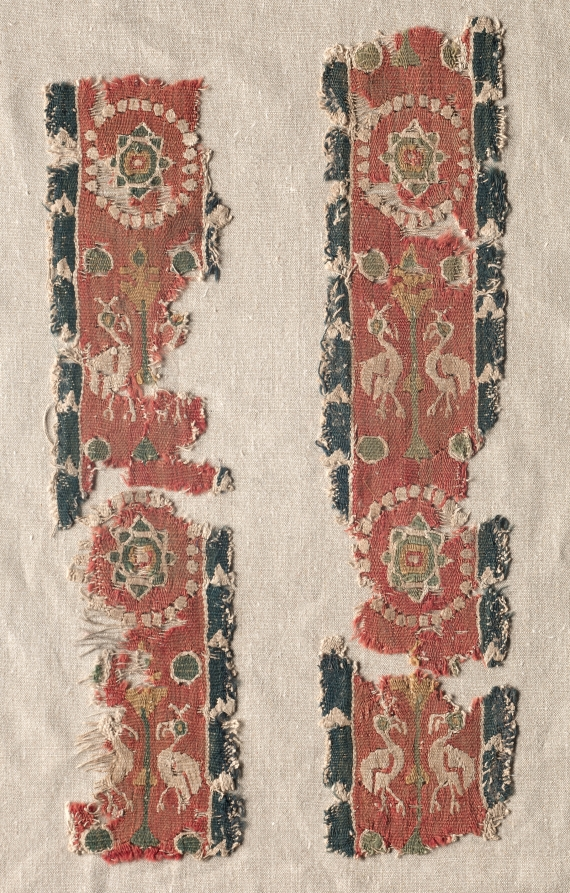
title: Fragmentary Band, Probably Part of a Clavus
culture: Egypt, late Abbasid or Tulunid period, 9th century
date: 800s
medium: tapestry; linen and wool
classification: Textile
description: The textile's design consists of pairs of birds, possibly ibises, on either side of a tree alternating with a circle of pearls enclosing an eight-pointed star.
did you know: These tapestry fragments were probably part of a clavus, a decorative band attached to the hem or cuff of a tunic.